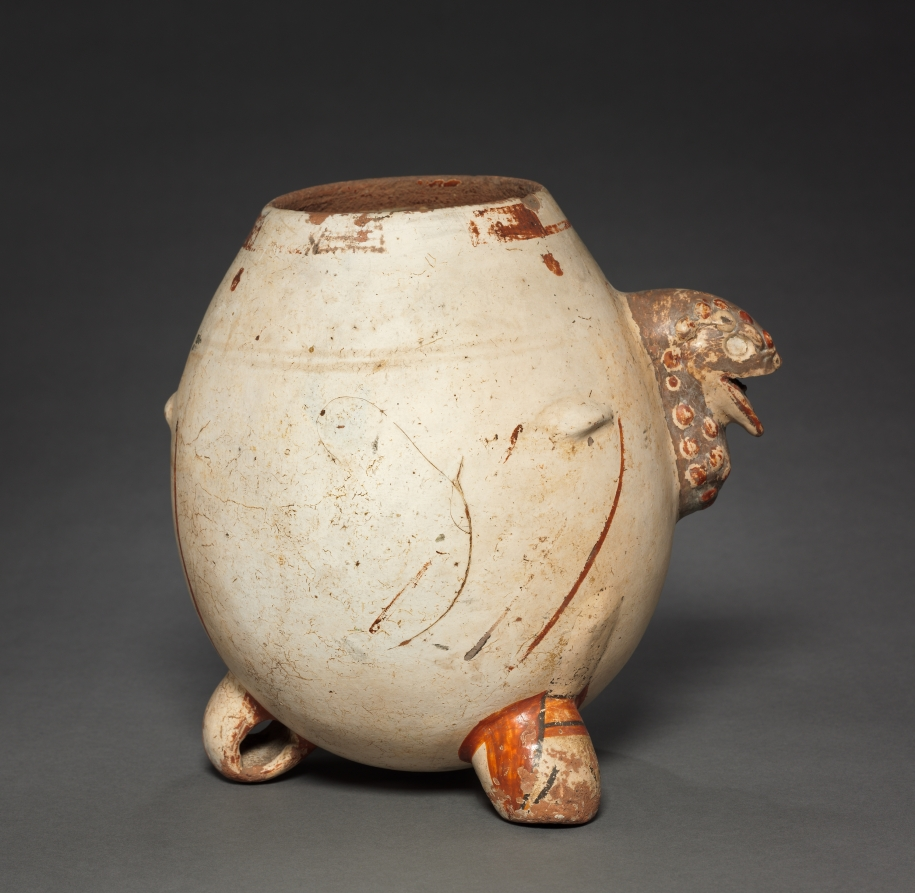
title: Footed Vase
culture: Costa Rica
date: 1000–1550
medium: earthenware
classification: Ceramic